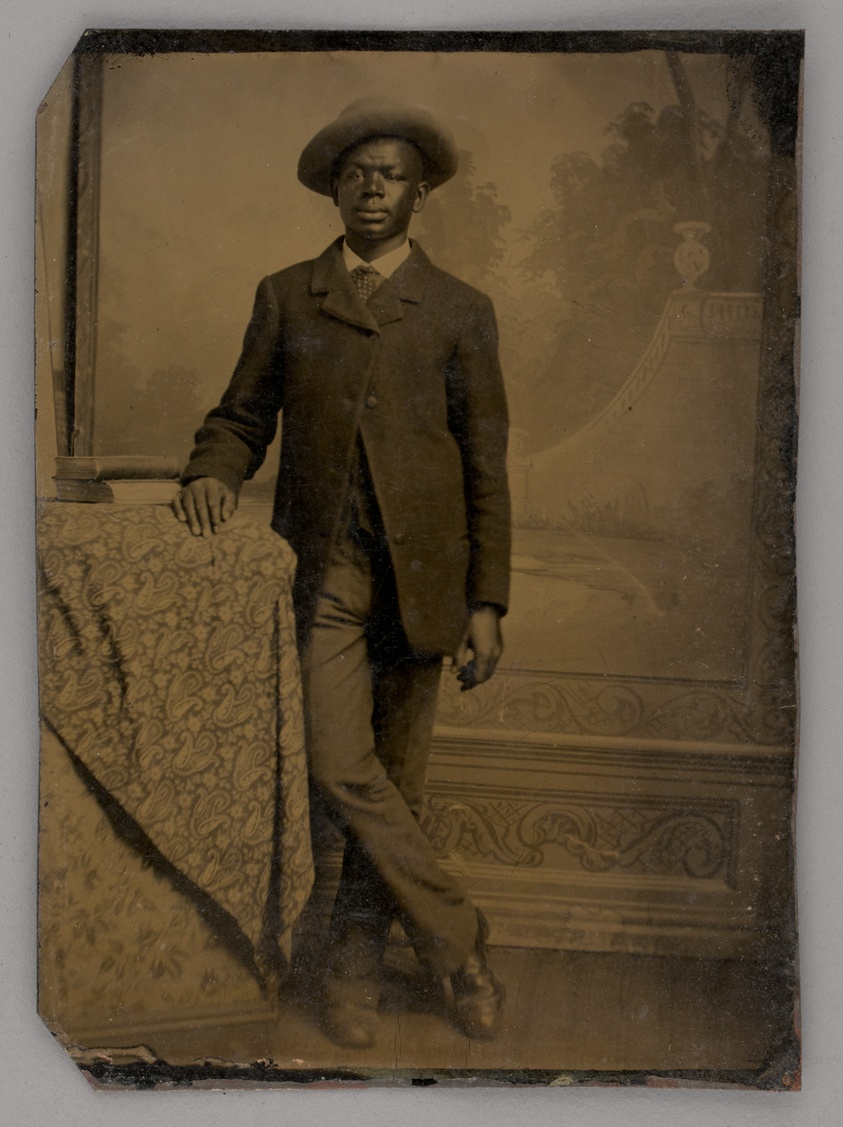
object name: Photograph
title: Untitled (Portrait of a Standing Man)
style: 19th century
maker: Unknown maker; American, 19th century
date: 1880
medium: Tintype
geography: United States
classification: portrait; tintype; photograph; photographic process; photography; portrait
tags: portraits: African American subject, lundberg collection, African American, portraits, portraits: male subject, portrait, men, Male